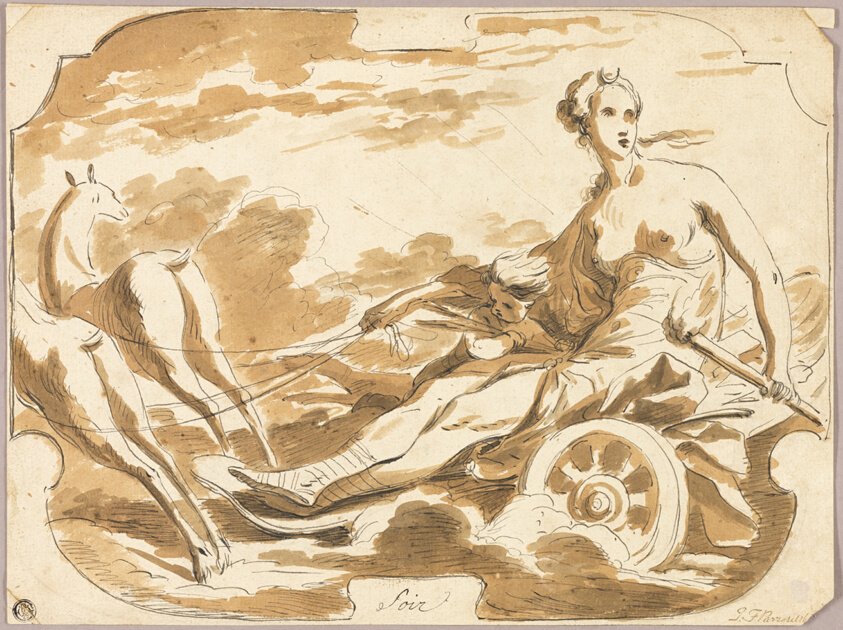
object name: Drawing and Watercolor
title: Diana in Her Chariot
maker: Joseph Francois Parrocel; French, 1704-1781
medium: Pen and black ink, with brush and brown wash, on cream laid paper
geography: France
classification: pen and ink drawings; paper; drawings (visual works); prints and drawing